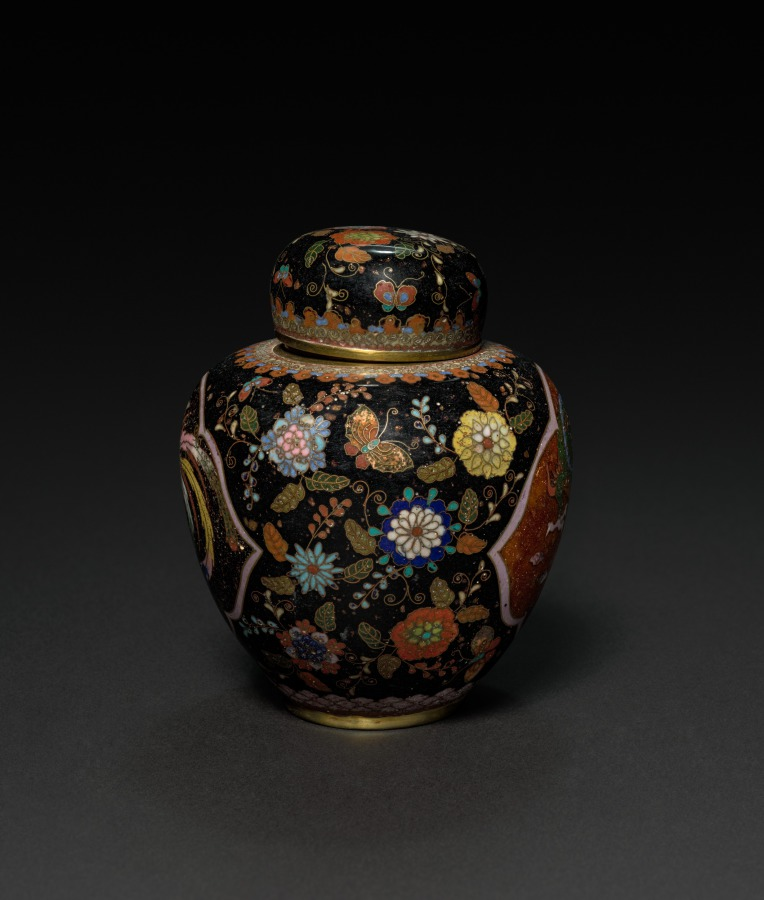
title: Ginger Jar with Phoenix and Dragon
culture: Japan, Meiji period (1868–1912) or Taishō period (1912–26)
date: early 1900s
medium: cloisonne enamel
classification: Enamel